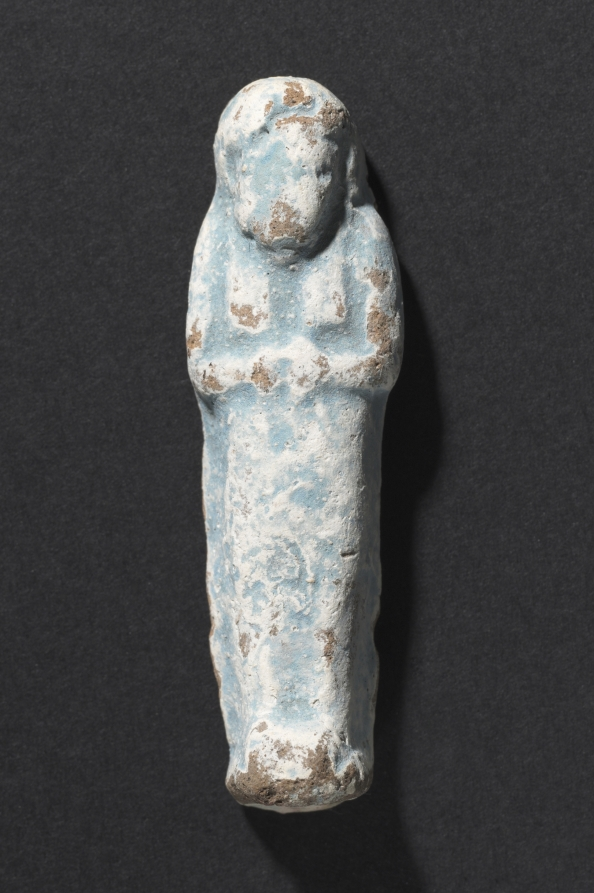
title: Shawabty of Ditamenpaankh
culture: Egypt, Late period (715–332 BCE), Dynasty 25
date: 715–656 BCE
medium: terracotta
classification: Funerary Equipment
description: High demand for shawabtys in the Late Period, a time when as many as 400 or more shawabtys were placed in the tomb with the deceased, gave rise to a specialized container for storing them: the shawabty box. This example is inscribed for the lady of the house, Ditamenpaankh, and was probably one of a pair originally made for her. The single-masted boat on the box's lid is perhaps an allusion to the pilgrimage of the deceased to the holy city of Abydos, the cult city of Osiris, king of the dead. The shawabtys inside are crude, mass-produced examples cast in an open mold. Made of terracotta, their blue paint imitates more costly shawabtys made of faience. As for the shawabty spell, it has been removed from its traditional location on the shawabty's front and relocated onto the sides of box, where it needed only to be written once, thus expediting production.